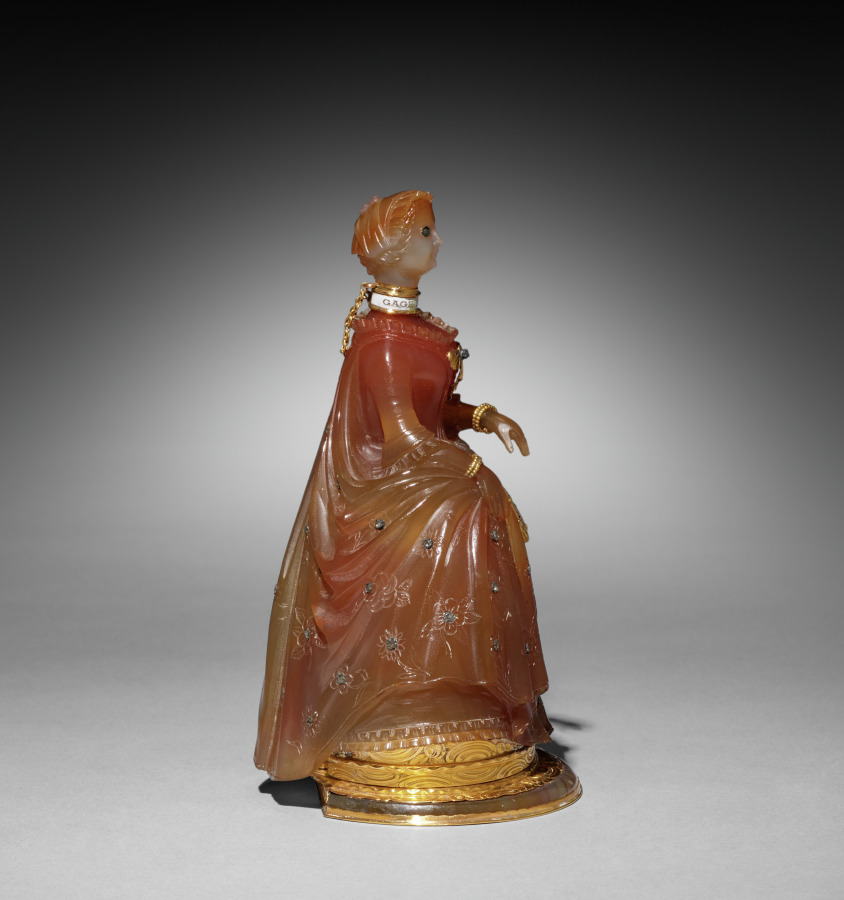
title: Scent Bottle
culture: England, 18th century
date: c. 1770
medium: chalcedony mounted in gold decorated with diamonds and enamel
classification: Miscellaneous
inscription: on neck collar: Gage d'amitie.